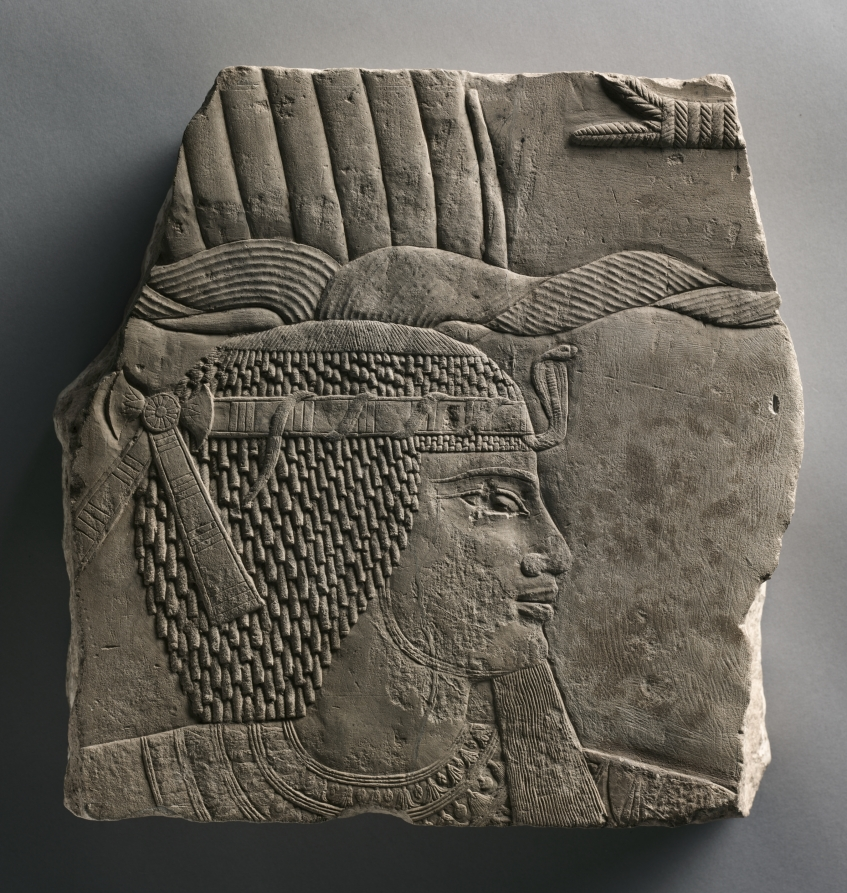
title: Relief of a King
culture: Egypt, Late period (715–332 BCE), Dynasty 26 or later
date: 664–525 BCE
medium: limestone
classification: Sculpture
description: A relief of exceptional quality and archaizing style. At the upper left is a section of the cartouche outlined in rope, as is found in archaic work. In many of its details this relief could be traced to the Old Kingdom, but the exceptional delicacy of the diadem, necklace, and false beard establish this as later archaizing work.